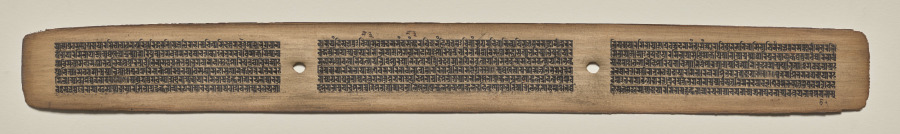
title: Text, Folio 77 (recto), from a Manuscript of the Perfection of Wisdom in Eight Thousand Lines (Ashtasahasrika Prajnaparamita-sutra)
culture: Eastern India, Bihar, Vikramashila Monastery. Painting: Nepal, Kathmandu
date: Sunday, September 14, 1119 (year 239 of the Newar Samvat in the month of Ashvina)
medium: gum tempera and ink on palm leaves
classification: Painting